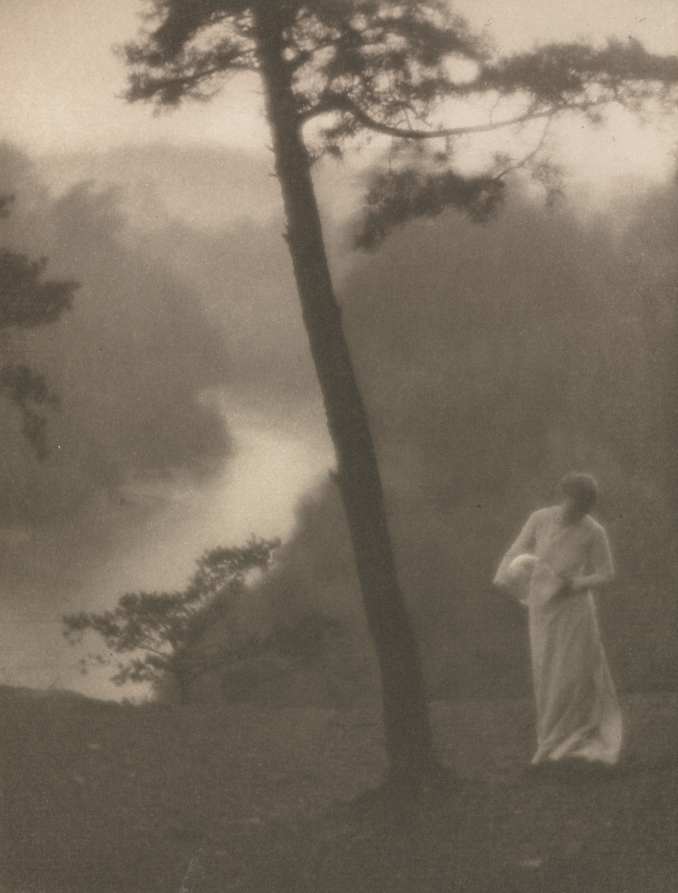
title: Camera Work: Morning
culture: America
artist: Clarence H. White (American, 1871–1925)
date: 1908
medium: photogravure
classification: Bound Volume